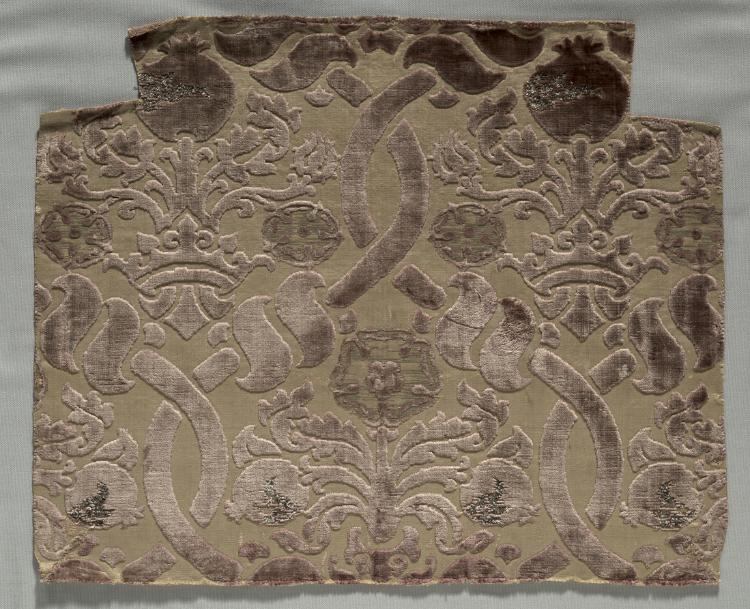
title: Velvet Fragment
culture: Italy, 16th century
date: 1500s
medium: velvet (cut, uncut, voided, brocaded); silk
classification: Velvet